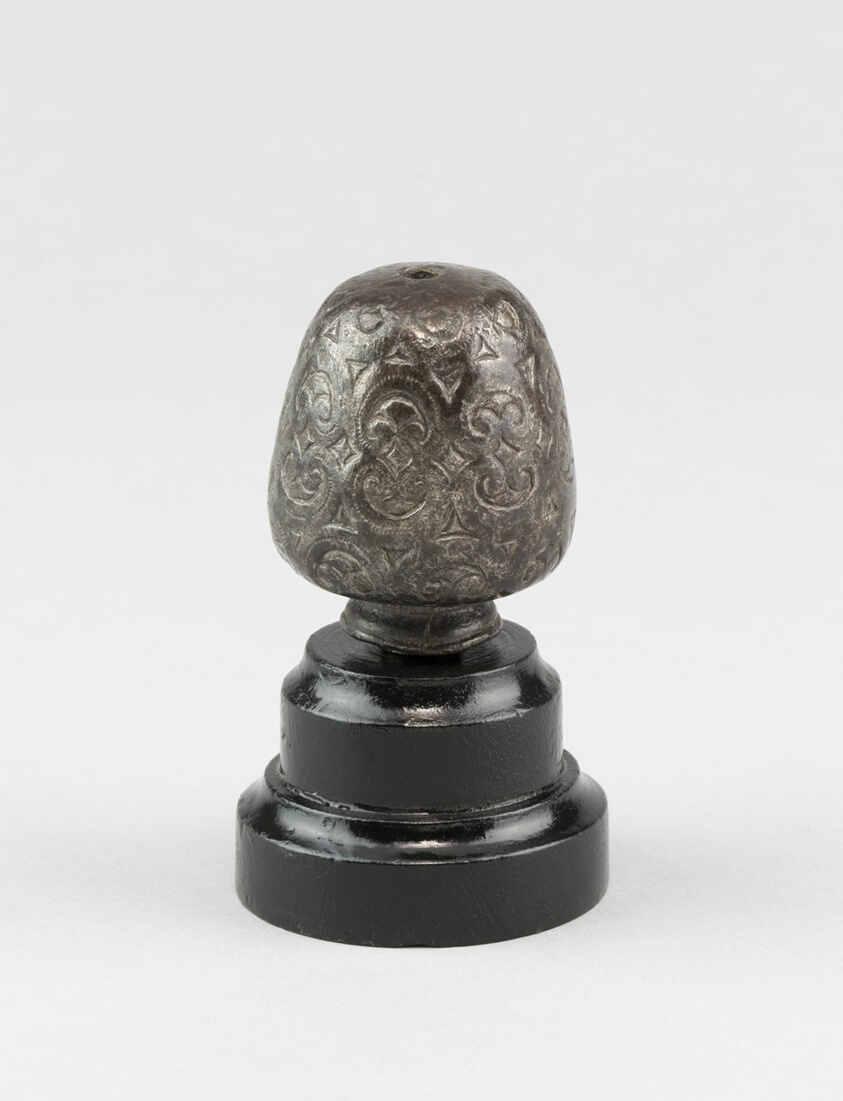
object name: Arms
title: Sword Pommel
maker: German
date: late 16th century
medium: Iron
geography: Germany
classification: edged weapon-sword; arms; arms and armor